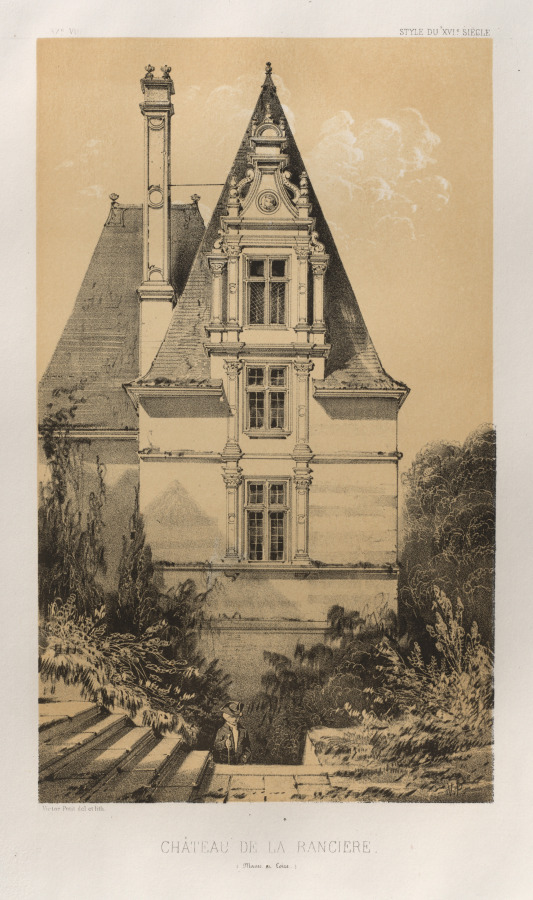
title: Architecture Pittoresque ou Monuments des xveme. Et xvieme. Siecles: Chateaux De France des XV et XVI Siecles: Pl. 37, Château De La Ranciere (Maine et Loire)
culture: France, 19th century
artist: Victor Petit (French, 1817–1874)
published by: Charles Boivin (publisher and editor); Lith de Godard a Paris (printer)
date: 1860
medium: lithograph with tint stone, from portfolio of 100 lithographs with tint stone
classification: Print